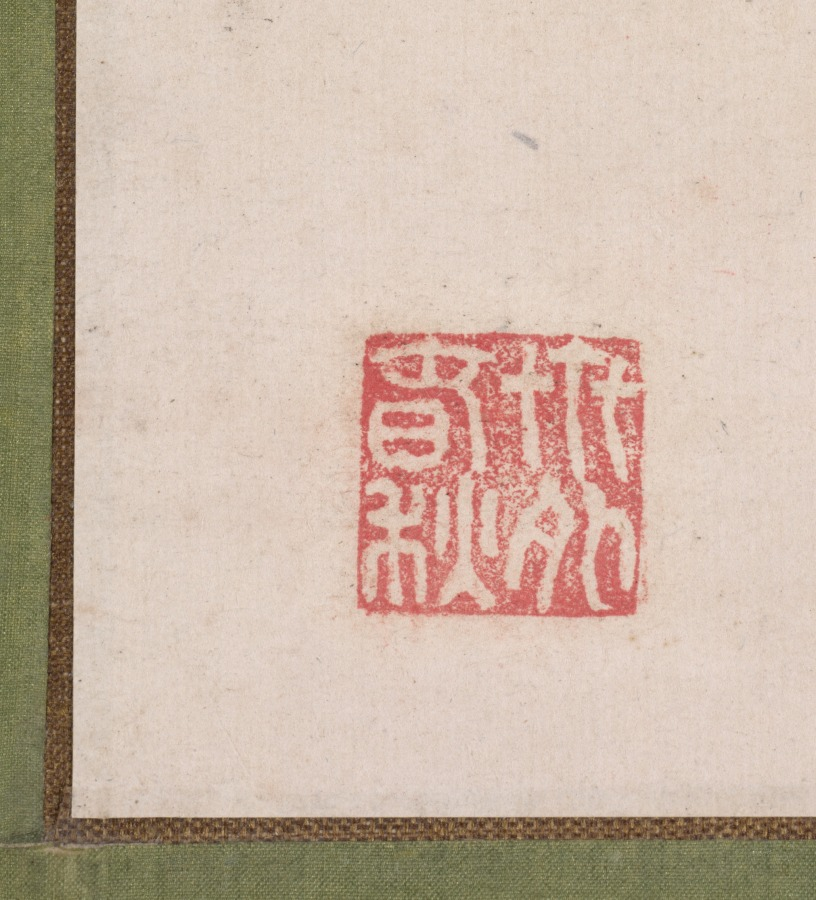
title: Landscape with Figures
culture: Japan, Edo period (1615–1868)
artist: Fujimoto Tesseki (Japanese, 1816–1863)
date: c. 1840–63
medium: hanging scroll; ink and color on paper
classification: Painting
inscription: Artist's inscription and two seals in upper right. A third seal in lower left.